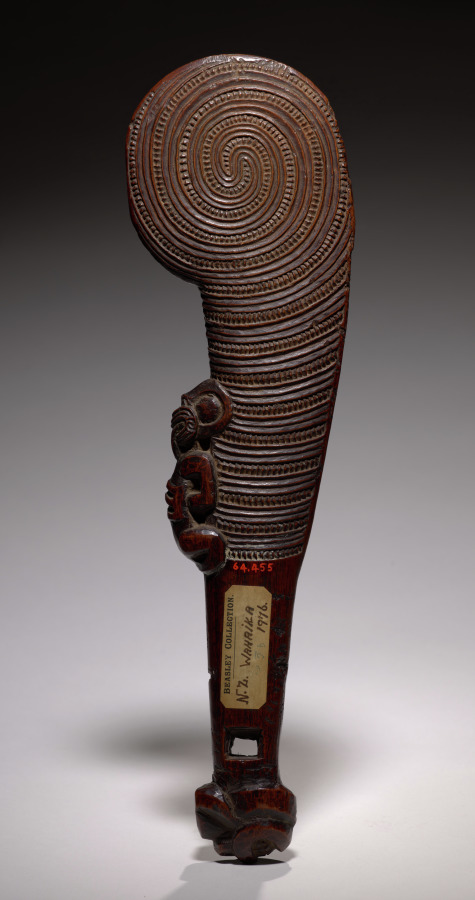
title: Short Club (Wahaika)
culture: Polynesia, New Zealand, Maori people, mid-19th Century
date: mid 1800s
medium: wood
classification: Sculpture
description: The wahaika, carried in a belt, was used by the Maori in hand-to-hand combat. Early, undecorated clubs were made of stone. Bone and wood clubs were decorated with increasingly complex carved designs. The small figure clinging to the side of this club may well represent the supernatural power (mana) of the weapon, while the face at the end of the grip expresses the aggression of combat.